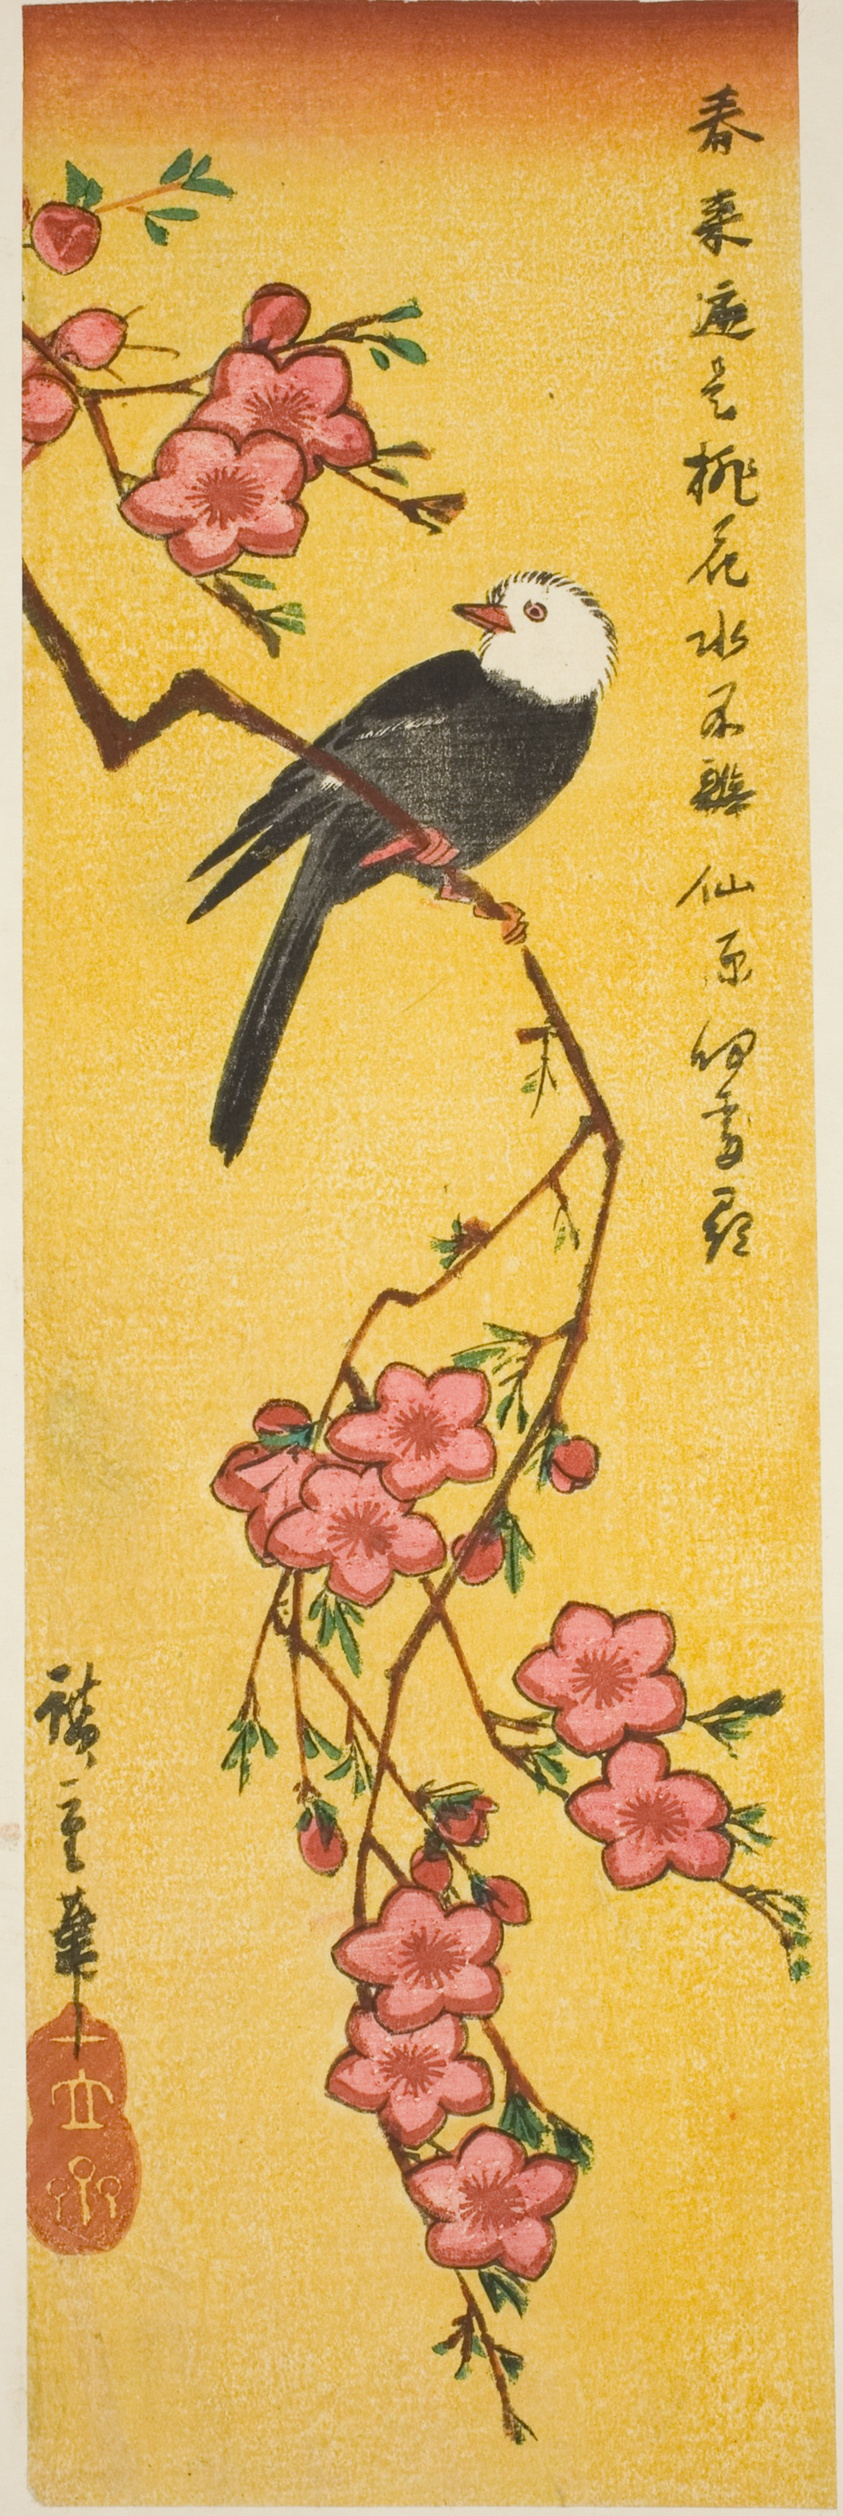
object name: Print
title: White-headed bird on peach branch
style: Japanese (culture or style)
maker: Utagawa Hiroshige 歌川 広重; Japanese, 1797-1858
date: c. 1840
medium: Color woodblock print; aitanzaku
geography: Japan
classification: woodblock print; print; asian art